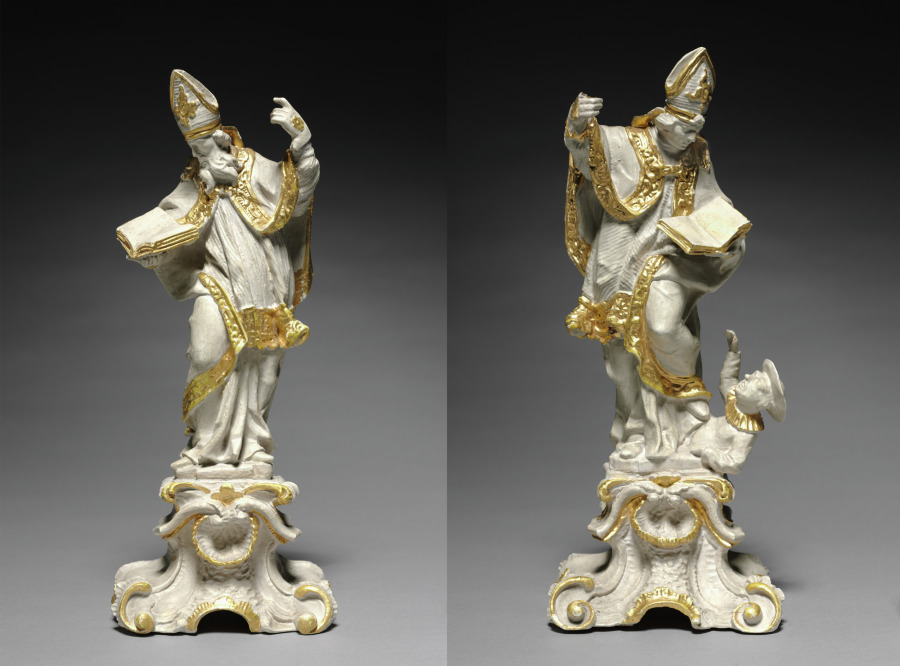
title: Bishop Saint Statuette Pair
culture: Germany, 18th century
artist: attributed to Ferdinand Tietz (Austrian, 1708–1777)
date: c. 1740–1750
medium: painted and gilded wood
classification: Sculpture